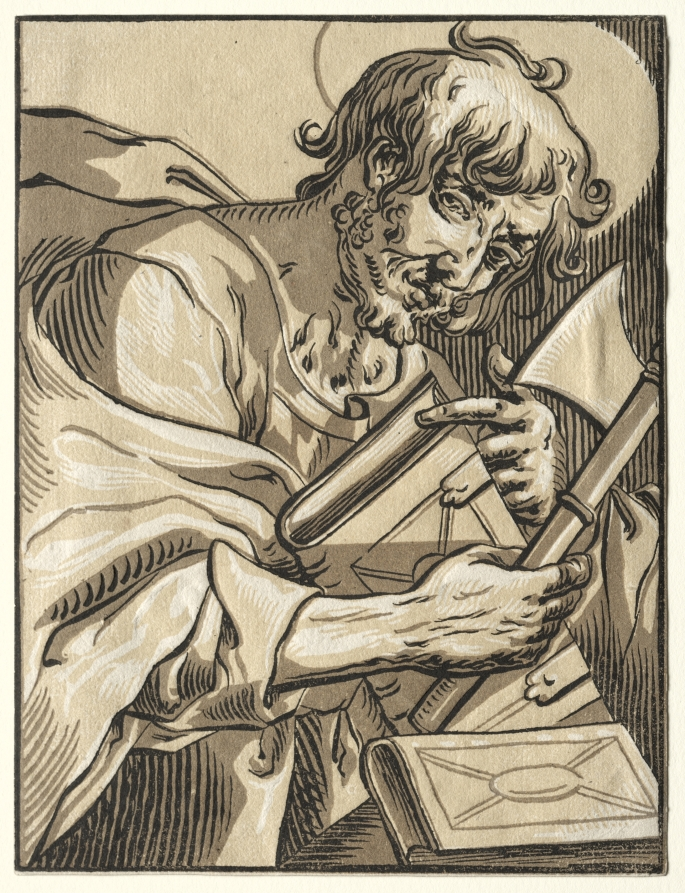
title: St. Matthias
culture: Germany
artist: Ludolph Büsinck (German, 1590–1669)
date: 1623–30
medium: chiaroscuro woodcut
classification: Print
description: Büsinck was a leading German master of the chiaroscuro woodcut and one of only a few artists working in this medium in the 17th century. He introduced chiaroscuros to France, and almost his entire output, executed between 1623 and 1630 in Paris, appears to be based on the drawings of the painter George Lallemand. Lallemand had special presses constructed to mass-produce Büsinck's prints, the only mid 17th-century workshop in France devoted to the production of chiaroscuros.